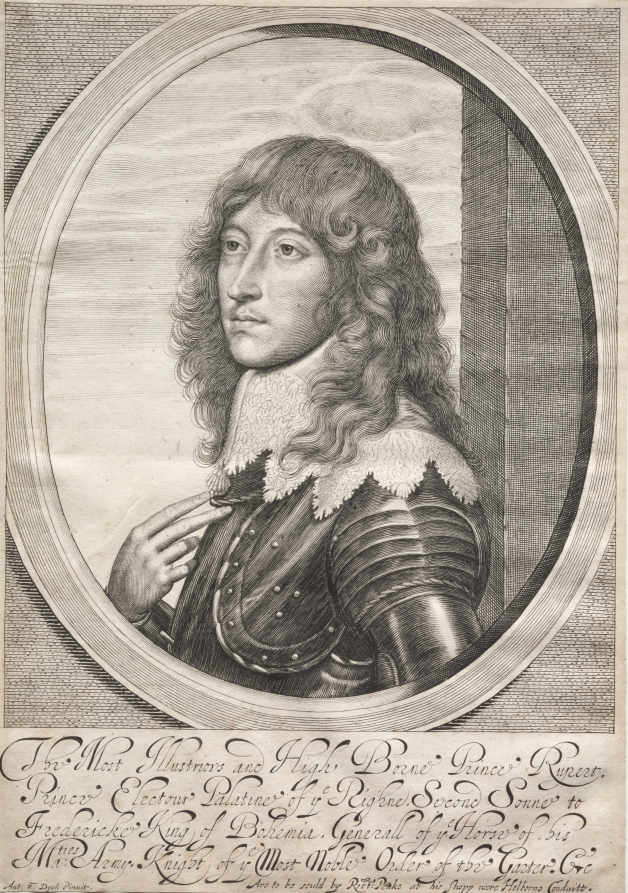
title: Prince Rupert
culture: England, 17th century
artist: William Faithorne (British, 1616–1691)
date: c. 1640–50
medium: engraving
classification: Print